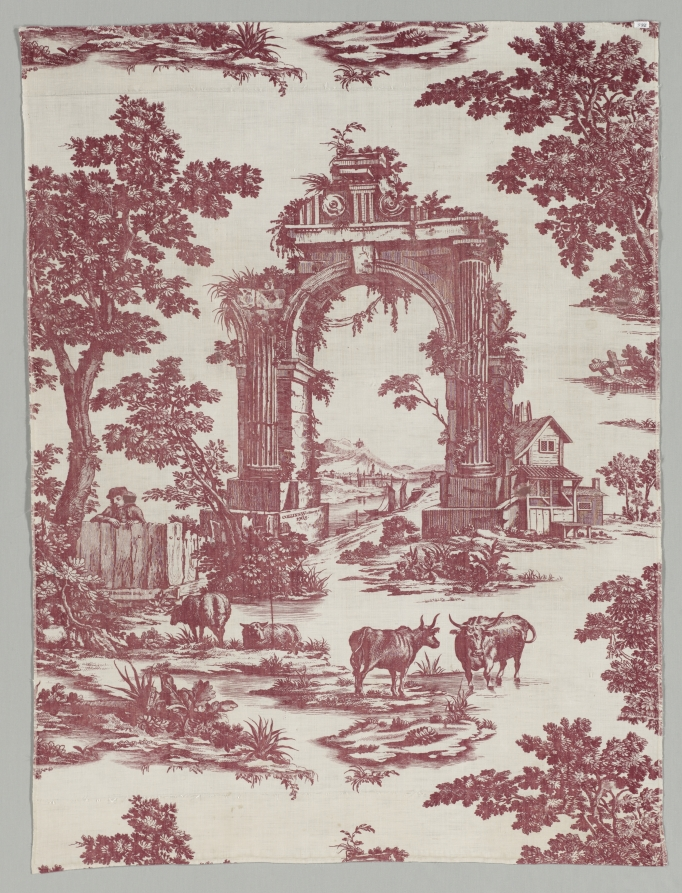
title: Copperplate Printed Cotton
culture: England, 18th century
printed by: firm of John Collins (British)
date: 1765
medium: copperplate printed cotton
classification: Textile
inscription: inscribed on the arch: "COLLINS Woolmers 1765" and "H. ROBERT sculp."